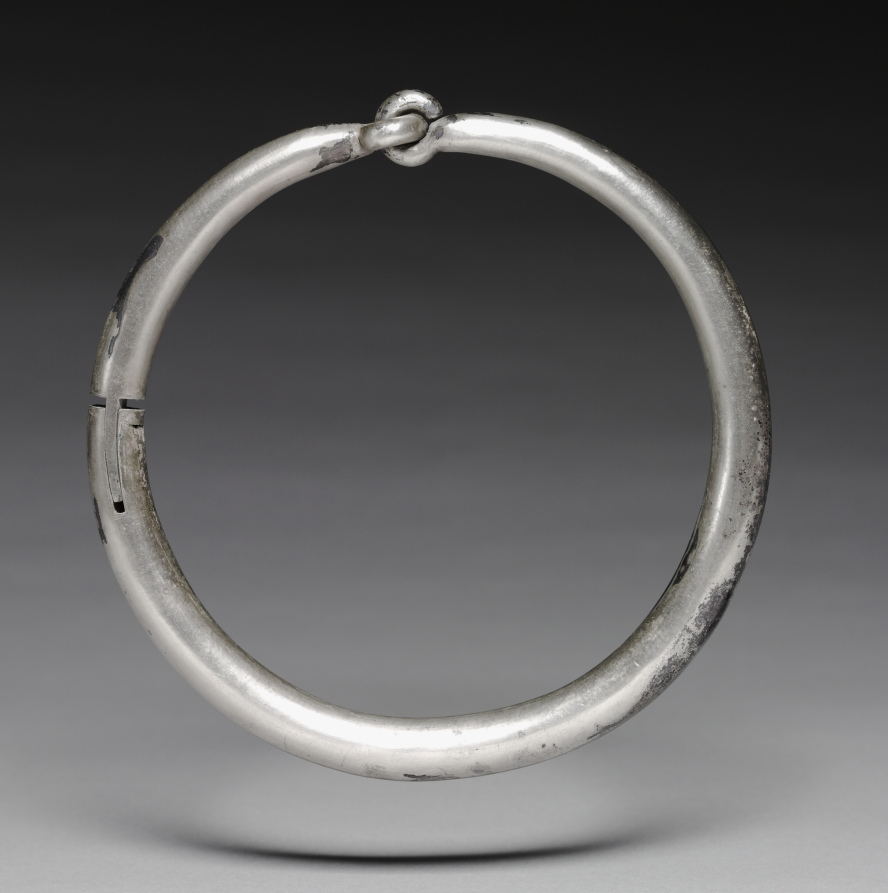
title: Torque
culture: Greece, late Hellenistic period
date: 200–1 BCE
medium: silver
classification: Metalwork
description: This torque, a type of necklace, is part of a set of jewelry including a bracelet of similar design (1986.182). Torques like this one were popular amongst the non-Greek speaking peoples of the ancient world, including the Scythians, Thracians, Persians, and many others. Though most torques are simple open-loop rings, this one was made with a hinge so that the wearer could open it to put it around their neck.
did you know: This torque is made from a single sheet of silver rolled into a tube and soldered lengthwise, then bent into a ring.